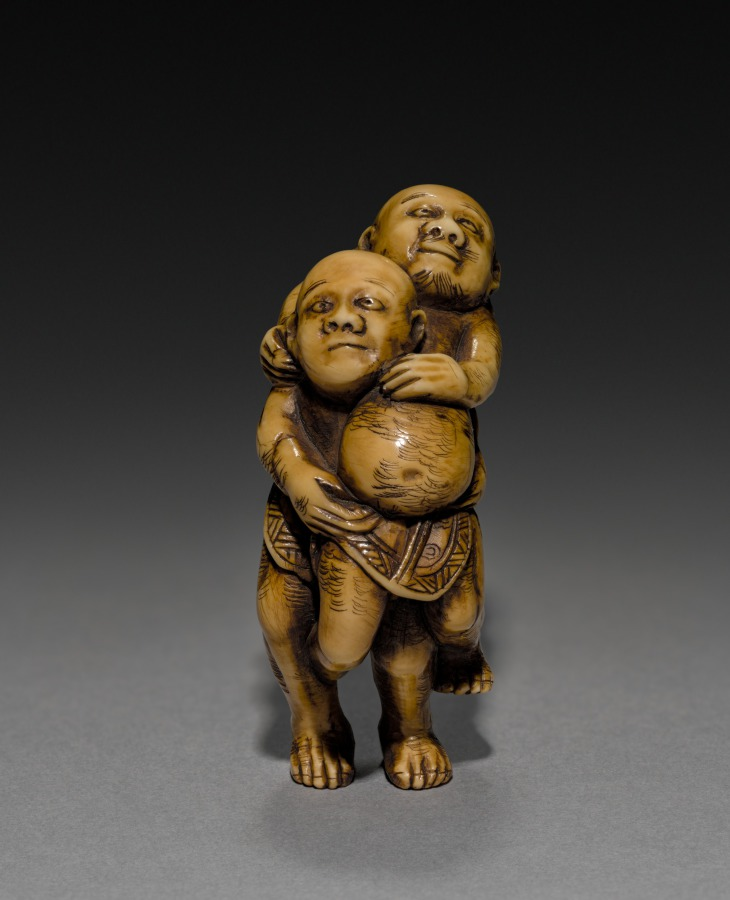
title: Man Carrying Another Man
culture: Japan, Meiji period (1868–1912)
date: early 1900s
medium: ivory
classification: Netsuke